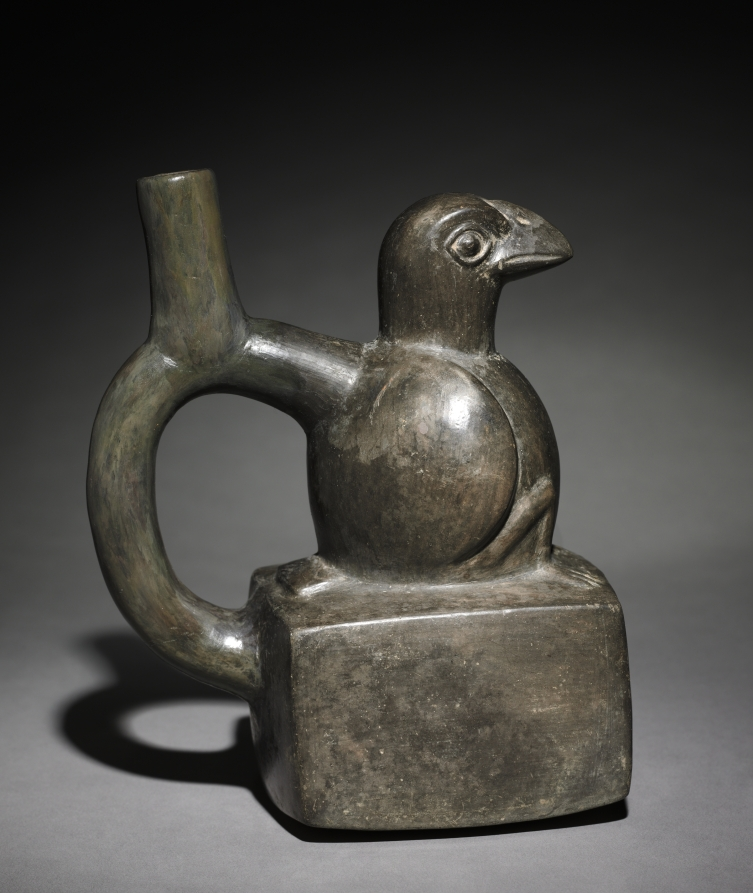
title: Darkware Vessel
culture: Peru, North Coast, Chimú style (900-1470)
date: 900–1470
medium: black ware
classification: Ceramic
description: Under the Chimú, ceramic seems to have been a less important artistic medium than for earlier north coast cultures. Accordingly, ceramics were mass produced with molds and, rather than bearing painted scenes, often have an overall dark surface achieved by firing in a smoky atmosphere.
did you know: Chimú potters fired their vessels in a reduced-oxygen atmosphere to achieve a uniform black surface.